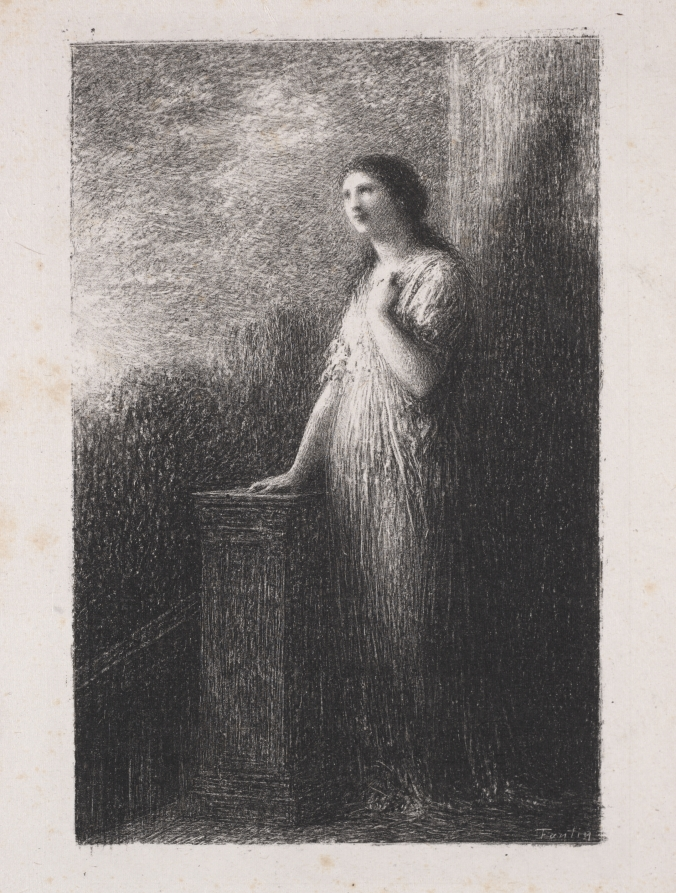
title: Confiding in the Night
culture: France, 19th century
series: Romeo and Juliet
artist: Henri Fantin-Latour (French, 1836–1904)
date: 1888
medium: lithograph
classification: Print